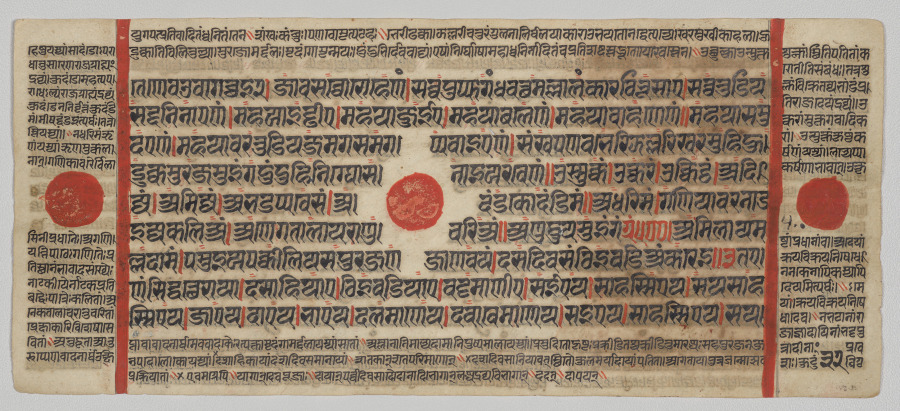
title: Text, Folio 32 (verso), from a Kalpa-sutra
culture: Western India, Gujarat, last quarter of the 15th century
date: c. 1475–1500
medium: Gum tempera, ink, and gold on paper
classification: Painting